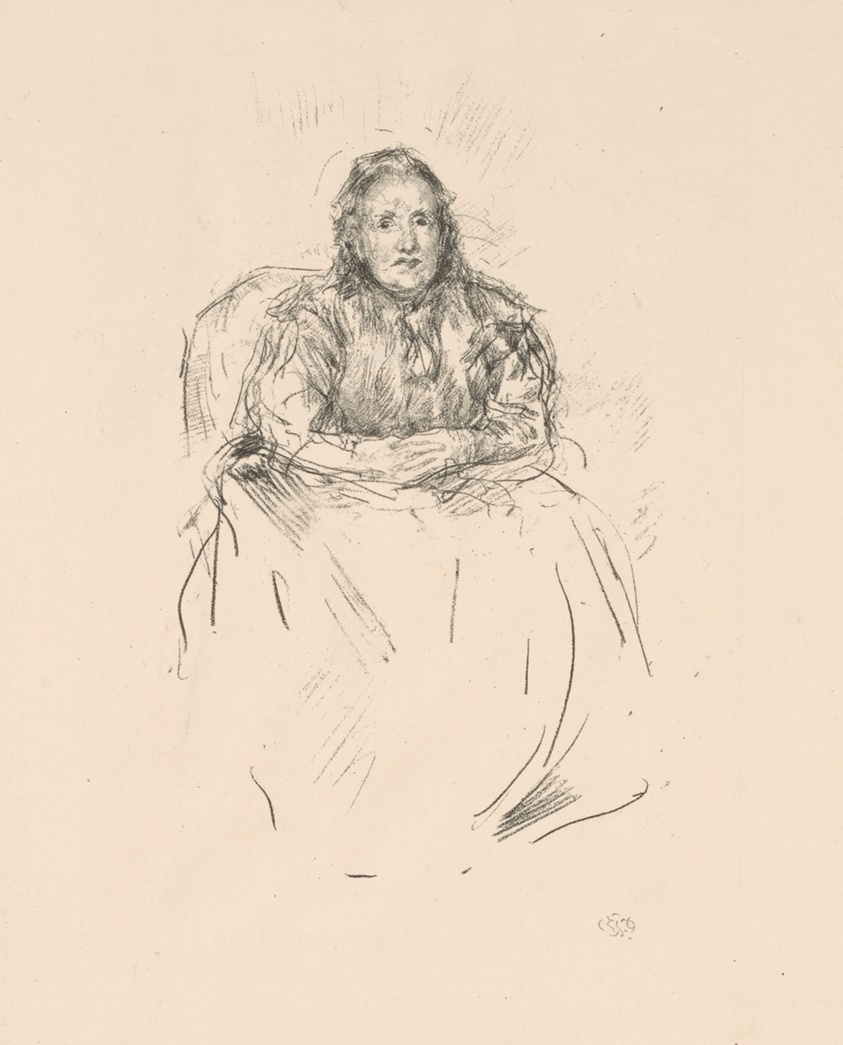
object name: Print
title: Portrait Study: Mrs. Philip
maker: James McNeill Whistler (American, 1834-1903)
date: 1896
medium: Transfer lithograph in black on ivory wove proofing paper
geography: United States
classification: transfer lithograph; lithograph; print; prints and drawing; paper